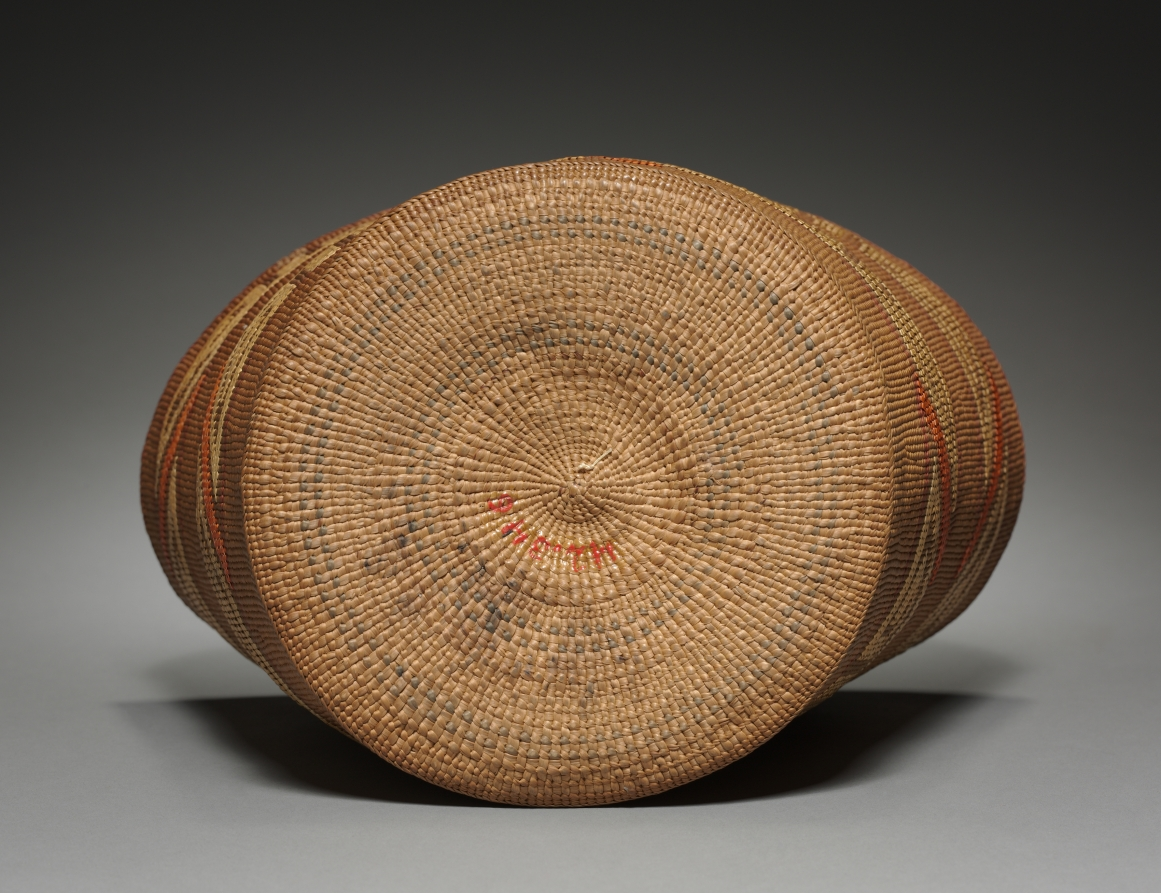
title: Bowl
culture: Northwest Coast, Tlingit, 20th century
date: before 1942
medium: twined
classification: Basketry